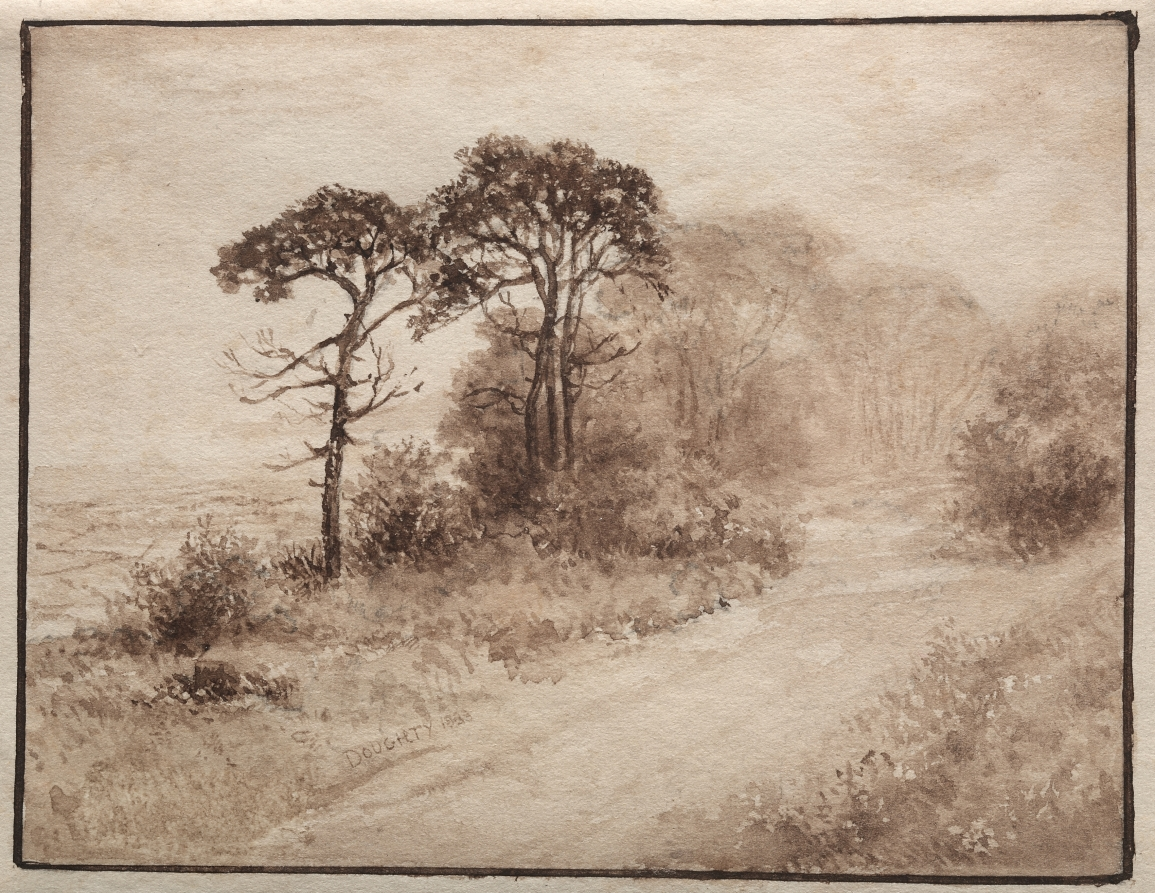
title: Landscape with Winding Road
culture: America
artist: Thomas Doughty (American, 1793–1856)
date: 1833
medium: brush and brown wash over graphite; framing lines in brown ink (scored)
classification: Drawing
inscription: signed, lower right, in brown ink: DOUGHTY 1833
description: Doughty belonged to the generation of American landscape painters who preceded the Hudson River school. Early compositions such as Landscape with Winding Road display his mastery of atmospheric effects and his familiarity with the contemporary popular aesthetic of the picturesque. Doughty became best known for his romantic interpretations of sublime American scenery—poetic evocations rather than literal portraits of specific locales.